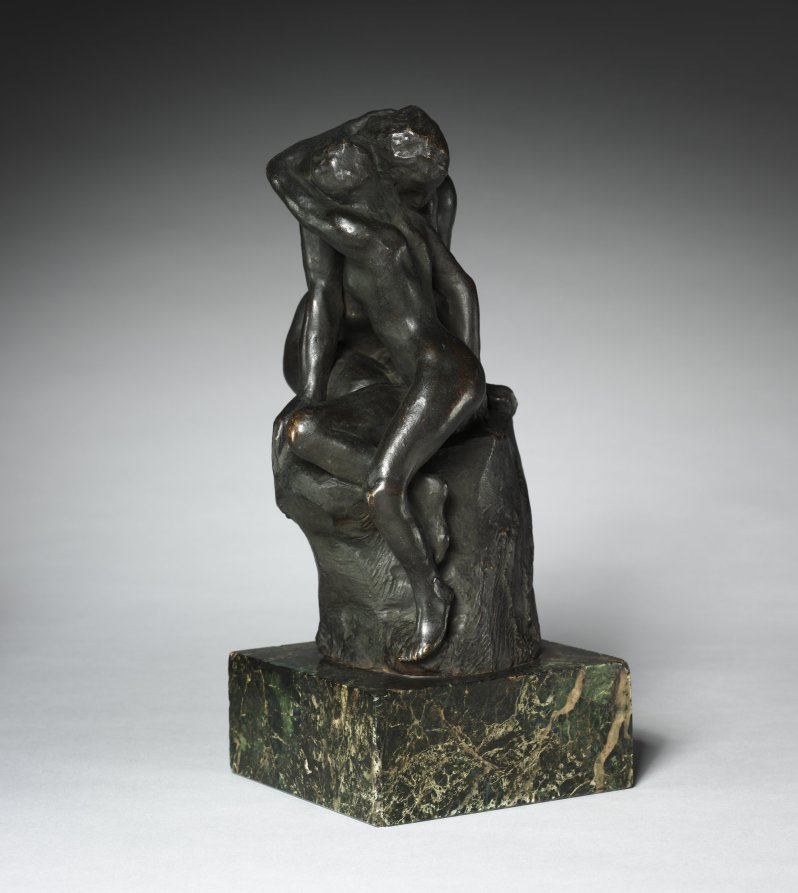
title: Young Girl Confiding Her Secret to Isis (Jeune fille confiant son secret à Isis)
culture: France, 19th century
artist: Auguste Rodin (French, 1840–1917)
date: 1899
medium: bronze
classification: Sculpture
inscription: Inscribed in area below larger figure's left hand and smaller figure's right hand: "Rodin"; below feet of larger figure: "L. Persinka, Fondeur, Versailles"